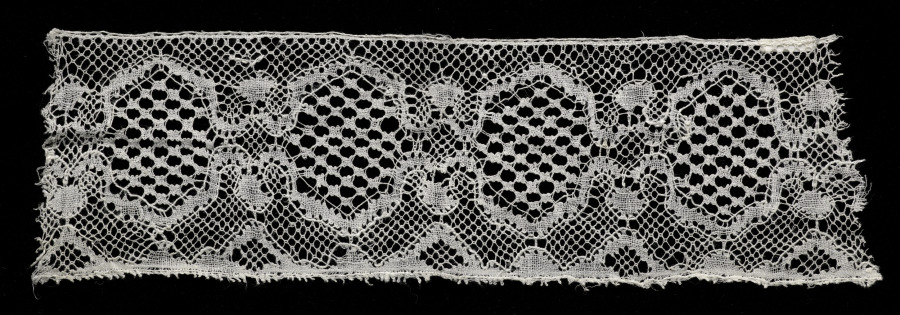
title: Lace Edging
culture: Spain, Seville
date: 1700s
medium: Linen: bobbin lace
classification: Lace